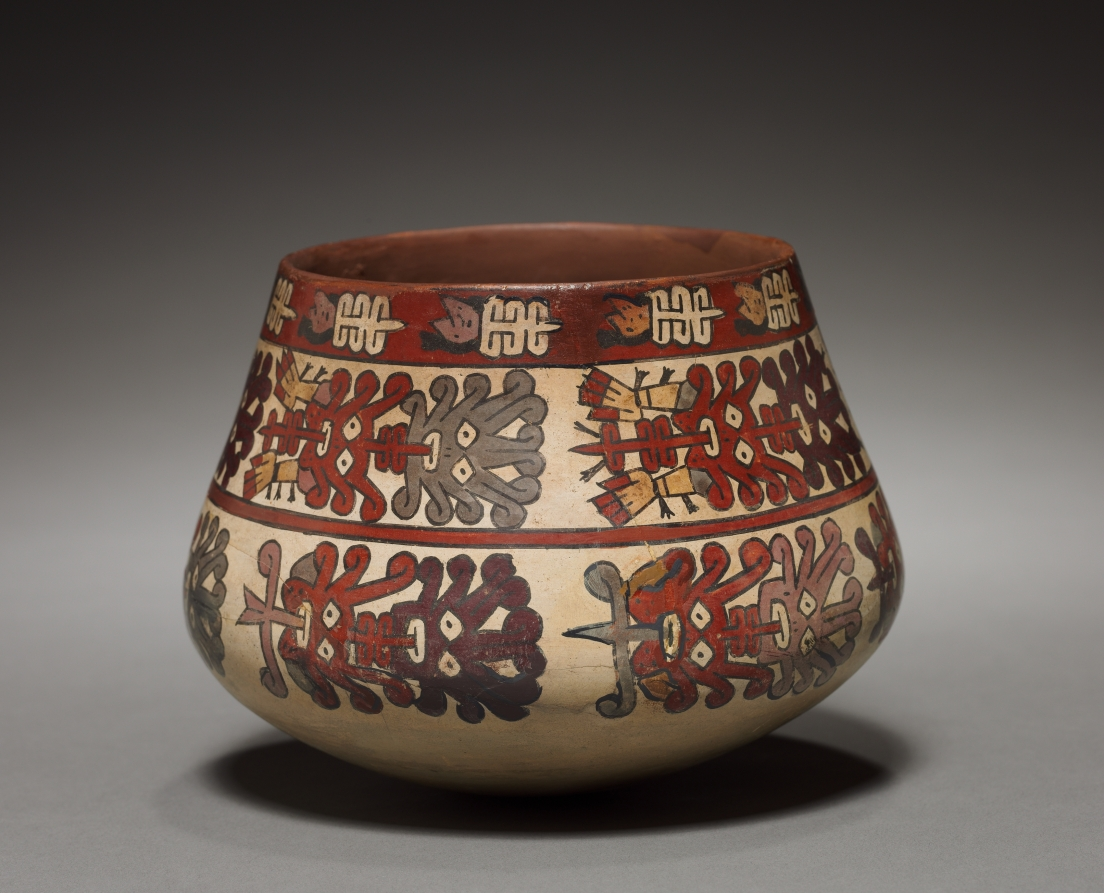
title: Vessel with Abstract Heads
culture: Peru, South Coast, Nasca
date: 100 BCE–700 CE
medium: earthenware with colored slips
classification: Ceramic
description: Late Nasca supernatural depictions became abstract, detailed, and focused on the head. In this vessel's central register, for instance, a deity is reduced to two mask-like faces, edged by volutes and linked by tongues; the only remains of a body are the hands. The lower register carries a similar image, and the upper register has severed human heads.